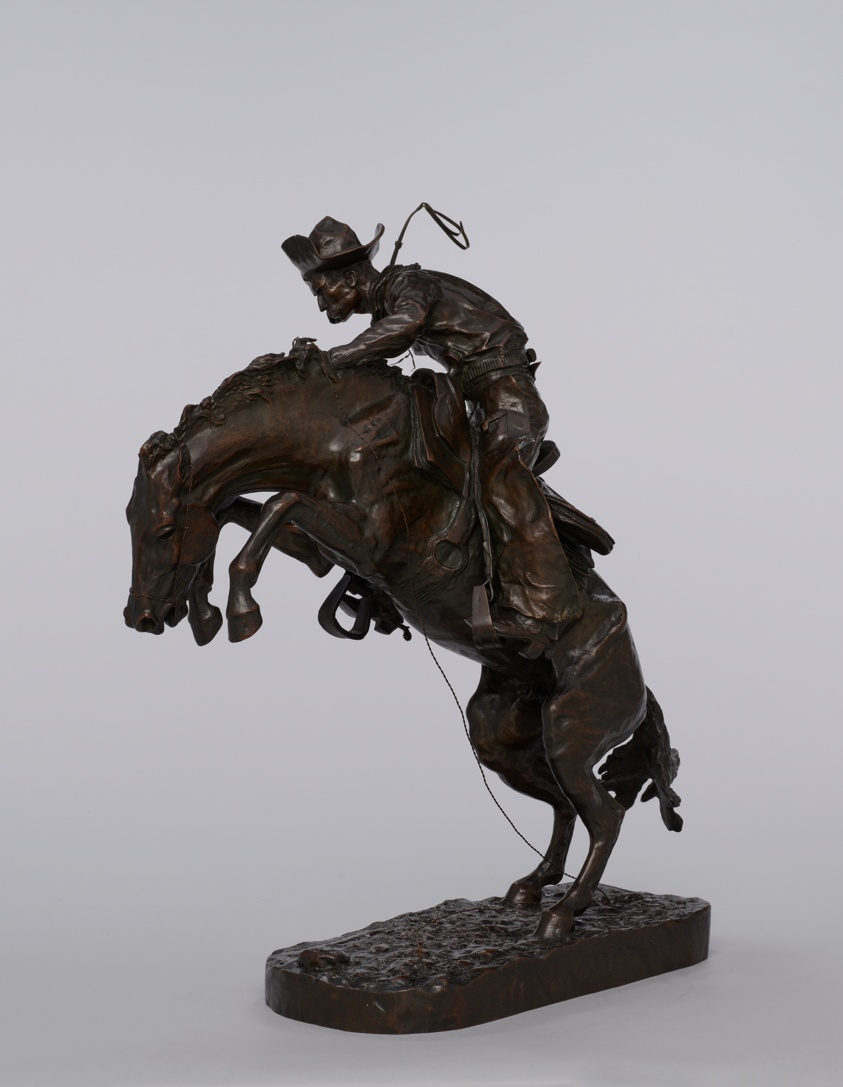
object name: Sculpture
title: The Bronco Buster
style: 19th century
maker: Frederic Remington (American, 1861–1909); Cast by Henry-Bonnard Bronze Co. (American, 19th century)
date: Modeled 1895, cast 1899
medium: Bronze with brown patina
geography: United States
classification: sculpture; american arts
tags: animals, rodeos, cowboys, horses, horseback riding, people, portraits